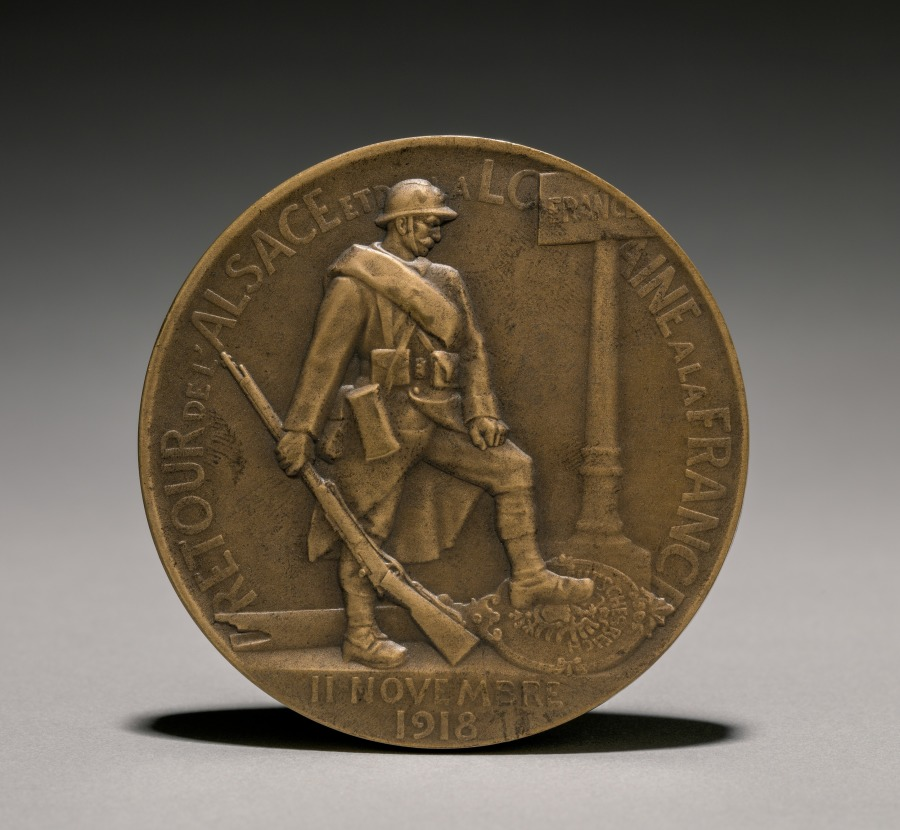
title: Medal (reverse)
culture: France, 20th century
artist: Paul Roger-Bloche (French)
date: 1900s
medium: bronze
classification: Metalwork